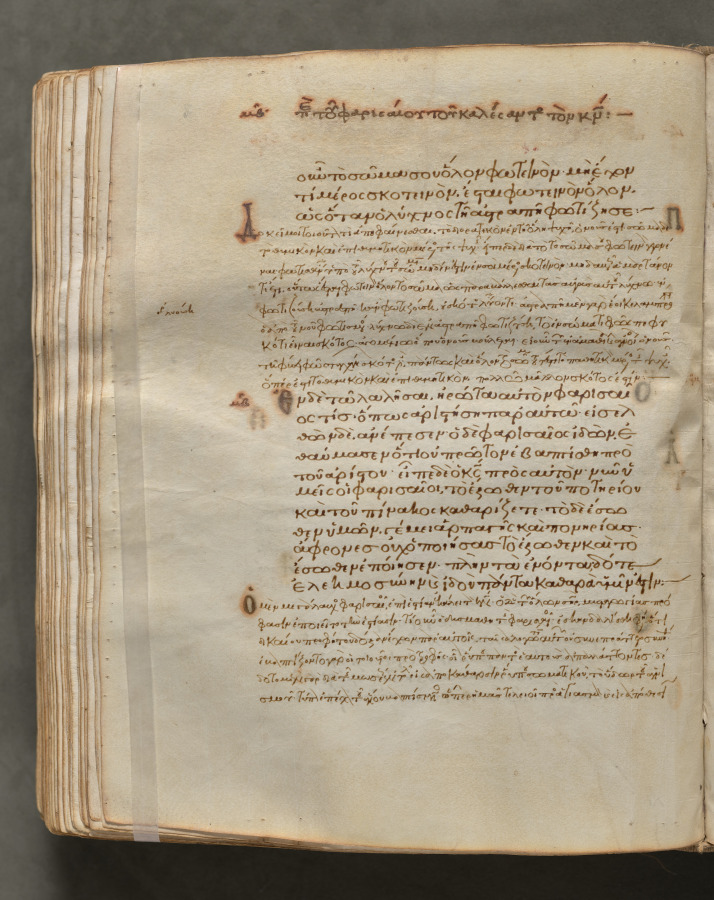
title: Text, folio 262 (verso), from a Gospel Book with Commentaries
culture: Byzantium, Constantinople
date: c. 1000–1100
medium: ink, tempera, and gold on vellum; leather binding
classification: Bound Volume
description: Each of the four gospels in this book opens on a page with brilliantly illuminated borders depicting the author of the text as well as birds—principally peacocks, symbols of the immortality of the soul—and fountains, representing the fountain of life and the salvation of the soul. This volume consists of 428 leaves with texts in Greek. Its level of sophistication suggests that it was probably written and decorated in a monastery in Constantinople.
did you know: Gospel books were carried in procession through Byzantine churches.